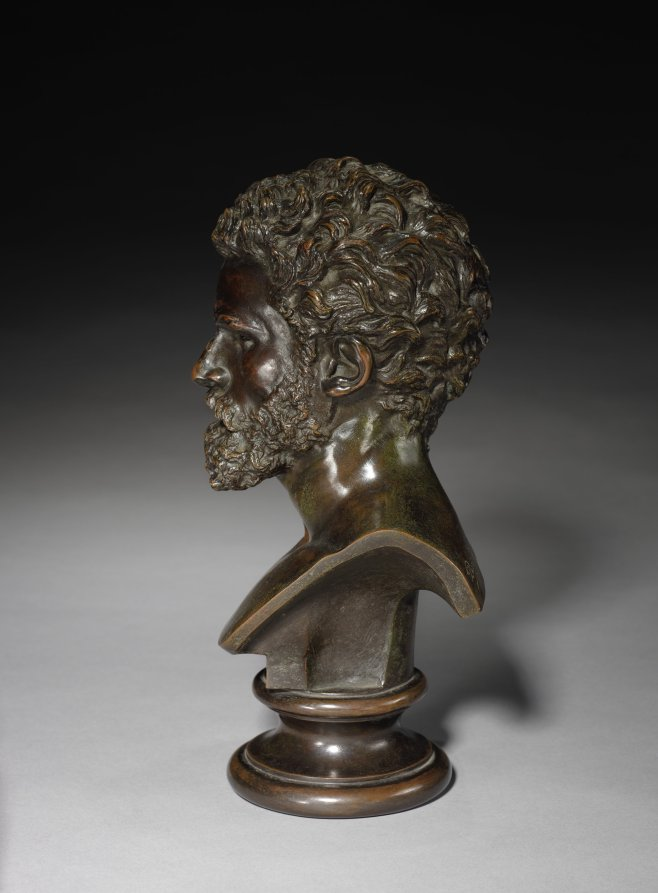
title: Henri Regnault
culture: France, 19th century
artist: Louis-Ernest Barrias (French, 1841–1905)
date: 1871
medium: bronze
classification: Sculpture